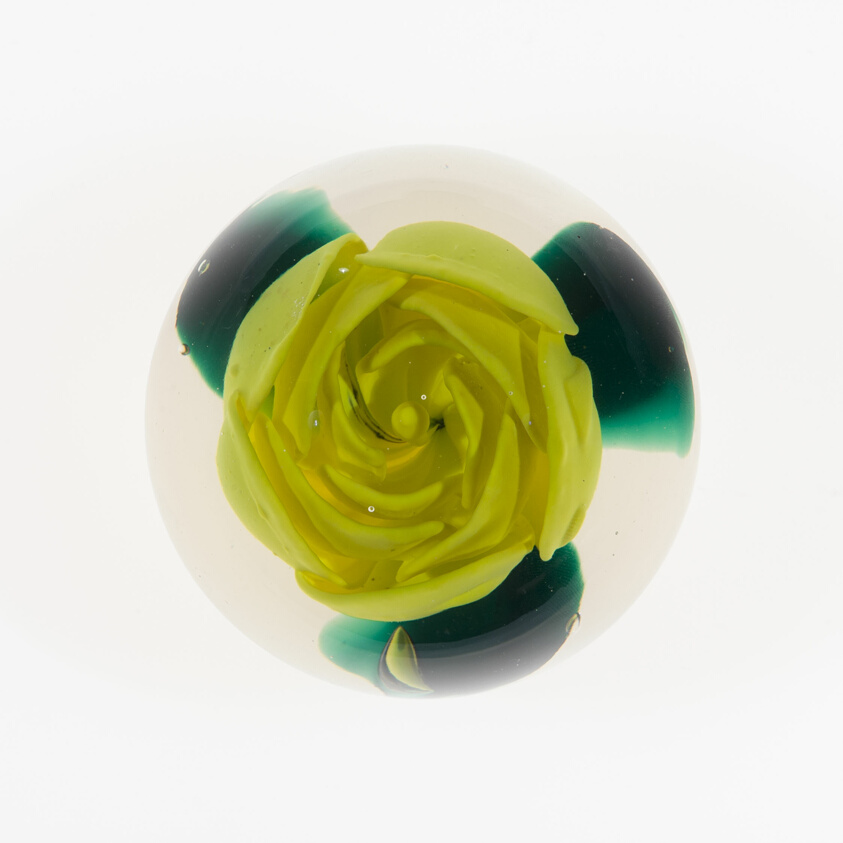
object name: Glass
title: Paperweight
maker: Whitall Tatum Glass Company, Millville NJ; American, founded 1806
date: Late 19th century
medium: Glass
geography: United States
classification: paperweight; glass